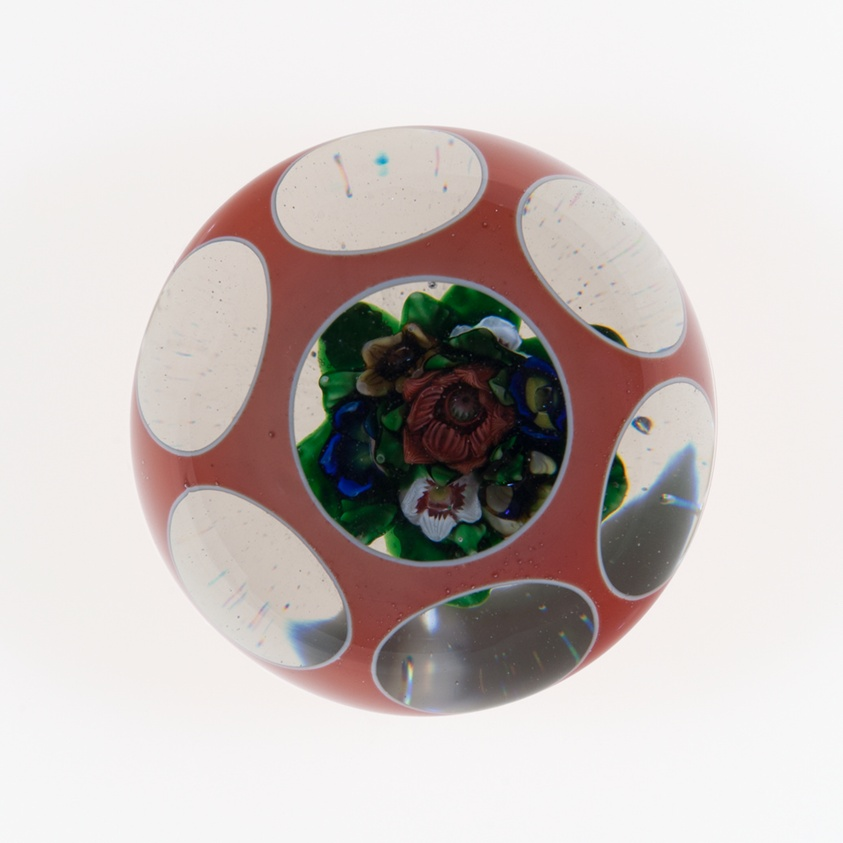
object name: Glass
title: Paperweight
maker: Saint-Louis Glassworks (Cristalleries de Saint-Louis); Lorraine, France, founded 1586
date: c. 1845–60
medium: Glass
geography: Saint-Louis-lès-Bitche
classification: paperweight; glass